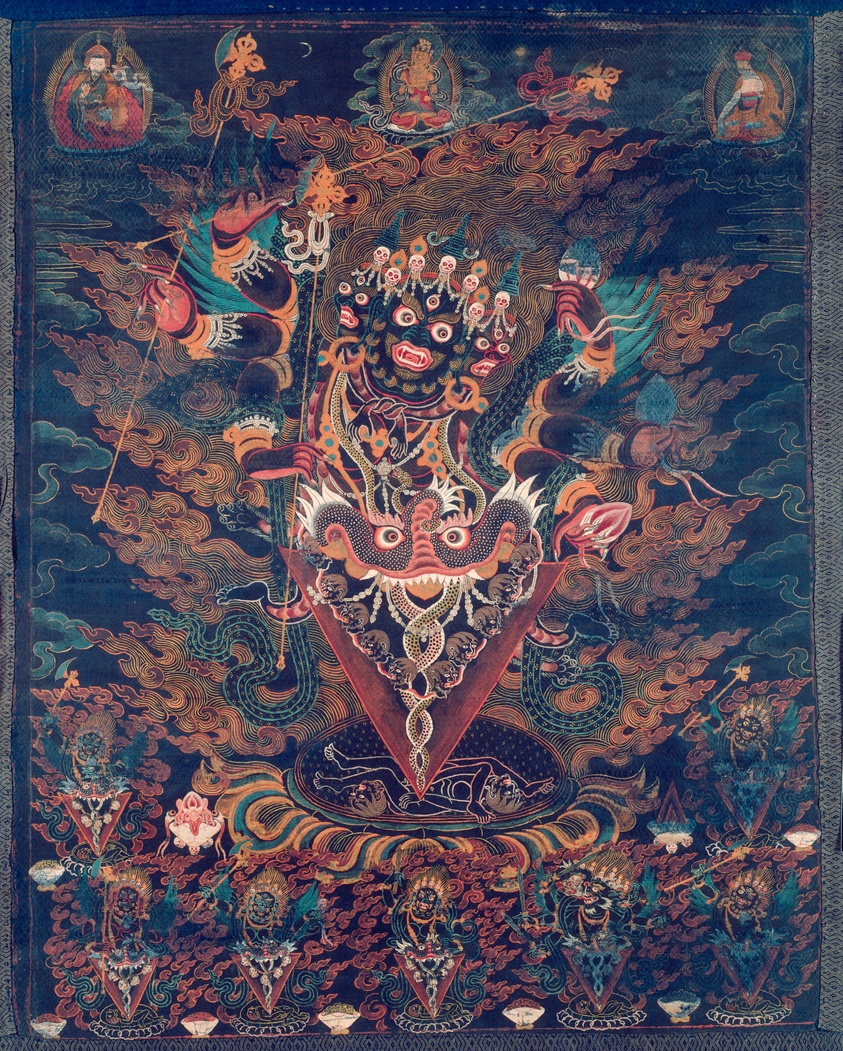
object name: Painting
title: Painted Banner (Thangka) with Guru Dragpur, a Wrathful Form of Padmasambhava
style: Himalayan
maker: Tibet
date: 18th/19th century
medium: Pigment on silk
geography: Tibet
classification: tankas (scrolls or banners); painting; asian art